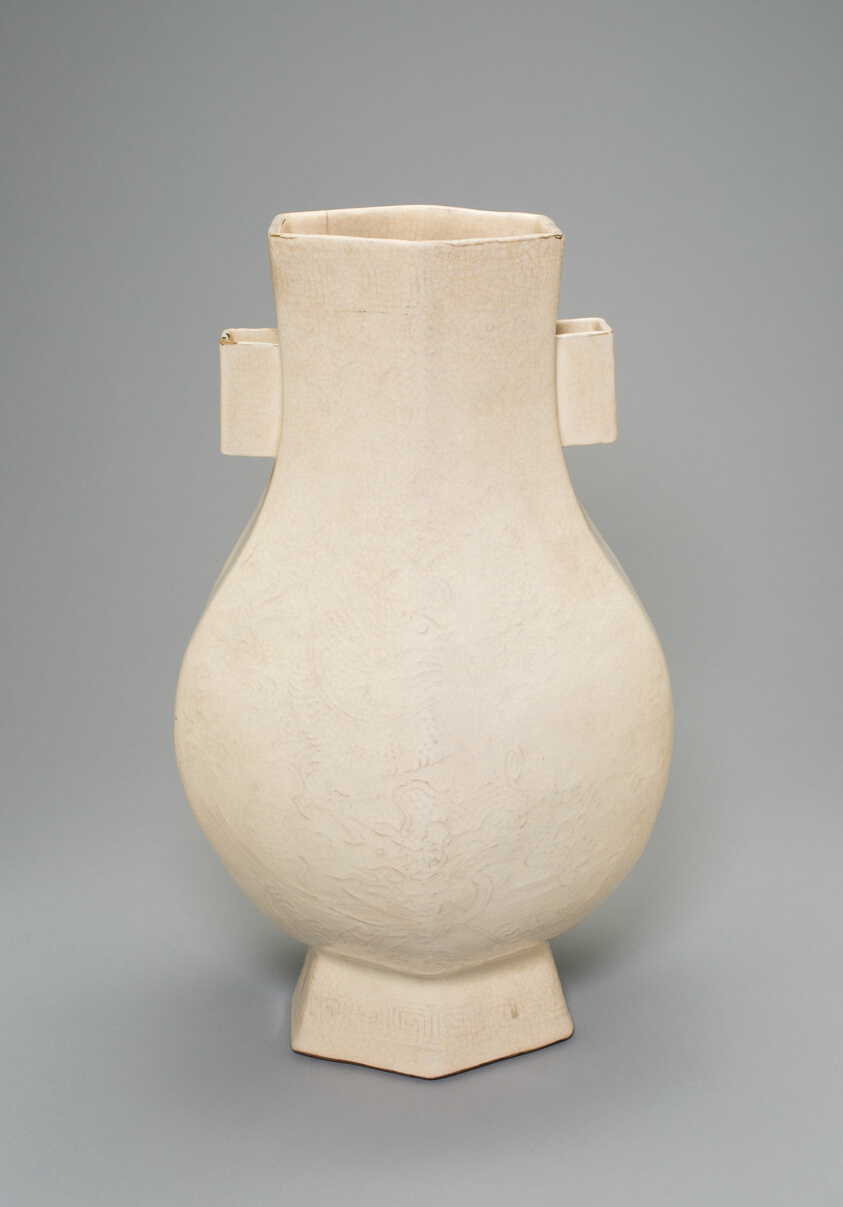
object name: Vessel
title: Vase in the Shape of an Archaic Bronze Vessel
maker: China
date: Ming dynasty (1368–1644) or earlier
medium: Ding ware; stoneware with underglaze molded decoration and white glaze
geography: China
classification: stoneware; asian art; ceramics